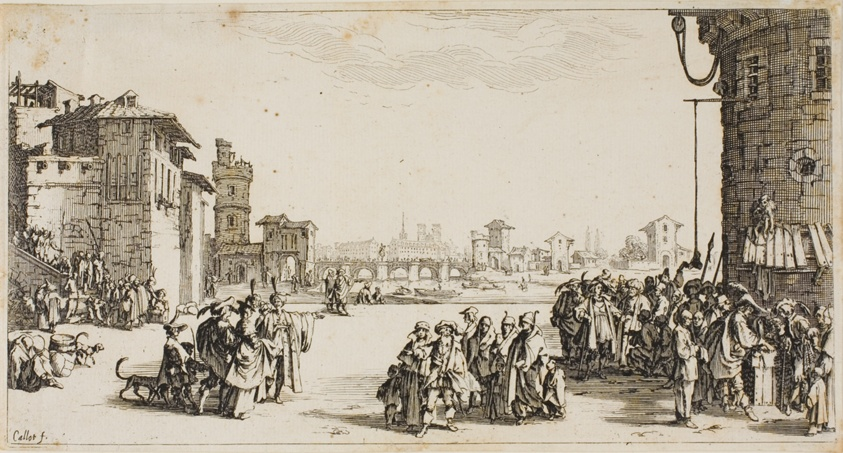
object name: Print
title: The Slave Market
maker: Jacques Callot (French, 1592-1635)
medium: Etching on paper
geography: France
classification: etching; print; prints and drawing